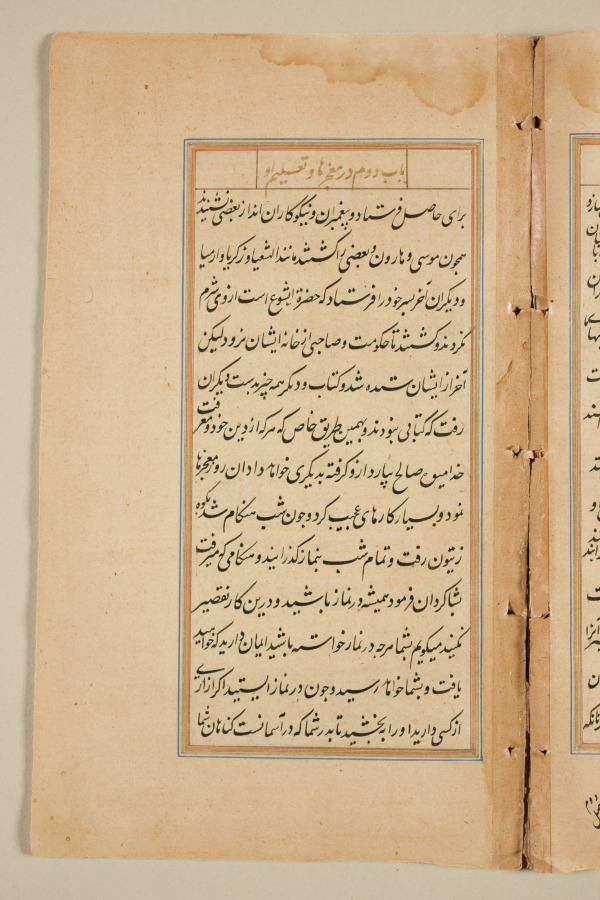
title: Text page from a Mirror of Holiness (Mir’at al-quds) of Father Jerome Xavier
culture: Mughal India, Allahabad, made for Prince Salim (1569–1627)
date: 1602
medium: Ink and gold on paper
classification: Manuscript